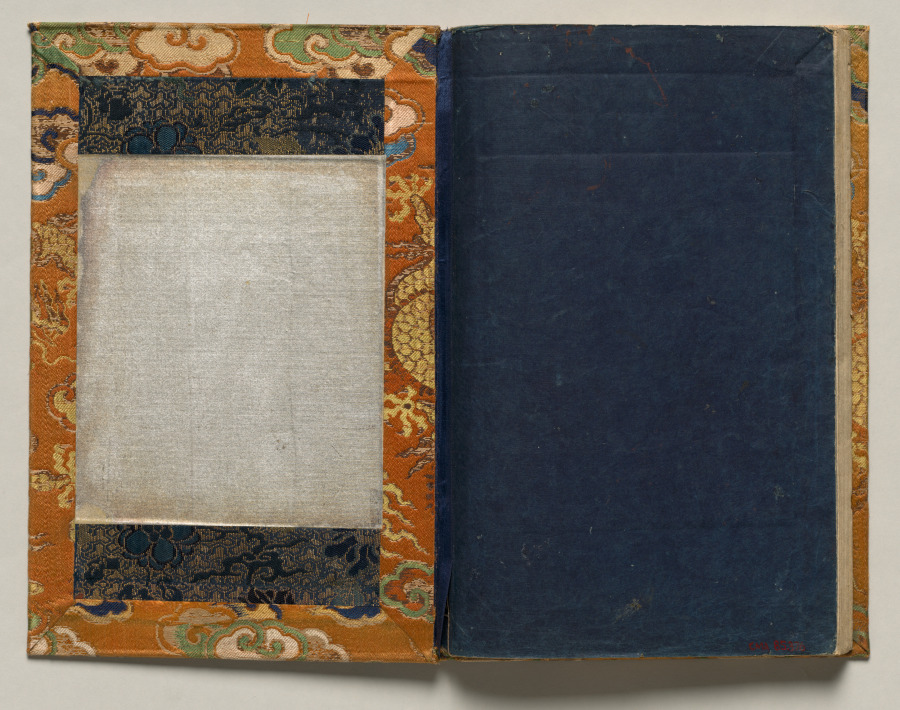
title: Shazanrō Picture Book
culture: Japan, Edo period (1615–1868)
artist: Tani Bunchō (Japanese, 1763–1841)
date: 1816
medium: Woodblock-printed book; ink and color on paper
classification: Bound Volume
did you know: Shazanrō was one of Tani Bunchō's style names.